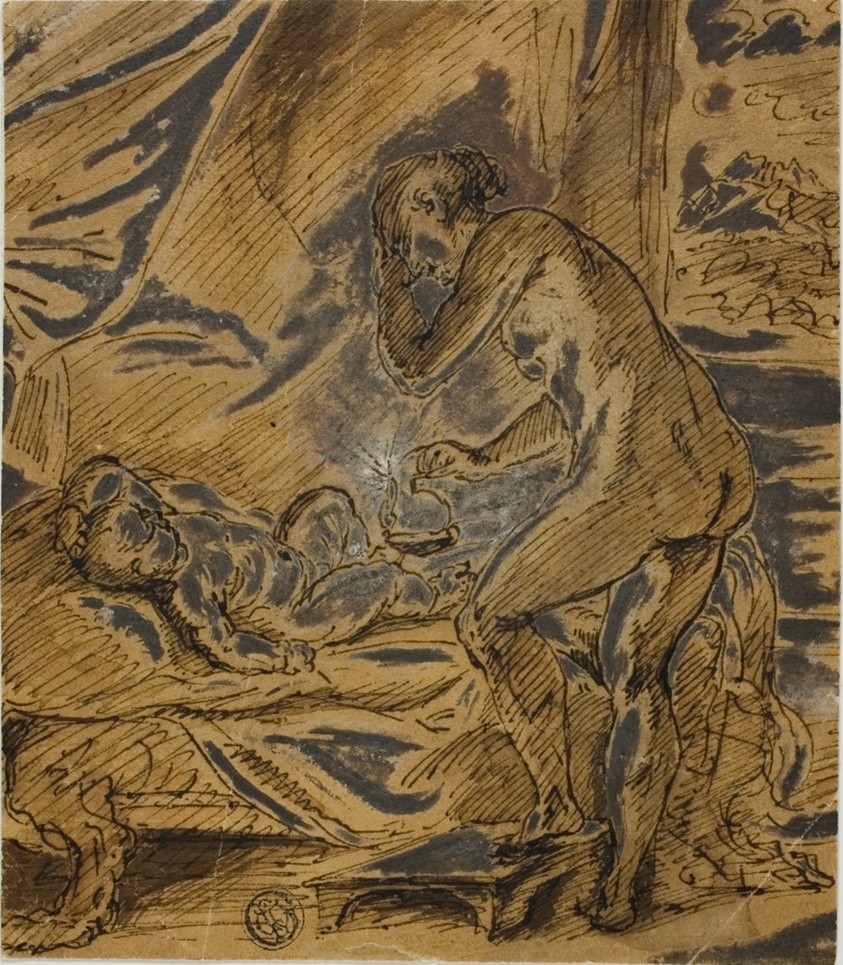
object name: Drawing and Watercolor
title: Cupid and Psyche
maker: Anthoni Schoonjans (Flemish, c. 1655-1726)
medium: Pen and brown ink, with brush and brown wash, heightened with lead white (discolored), on tan laid paper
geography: Flanders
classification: pen and ink drawings; drawings (visual works); prints and drawing